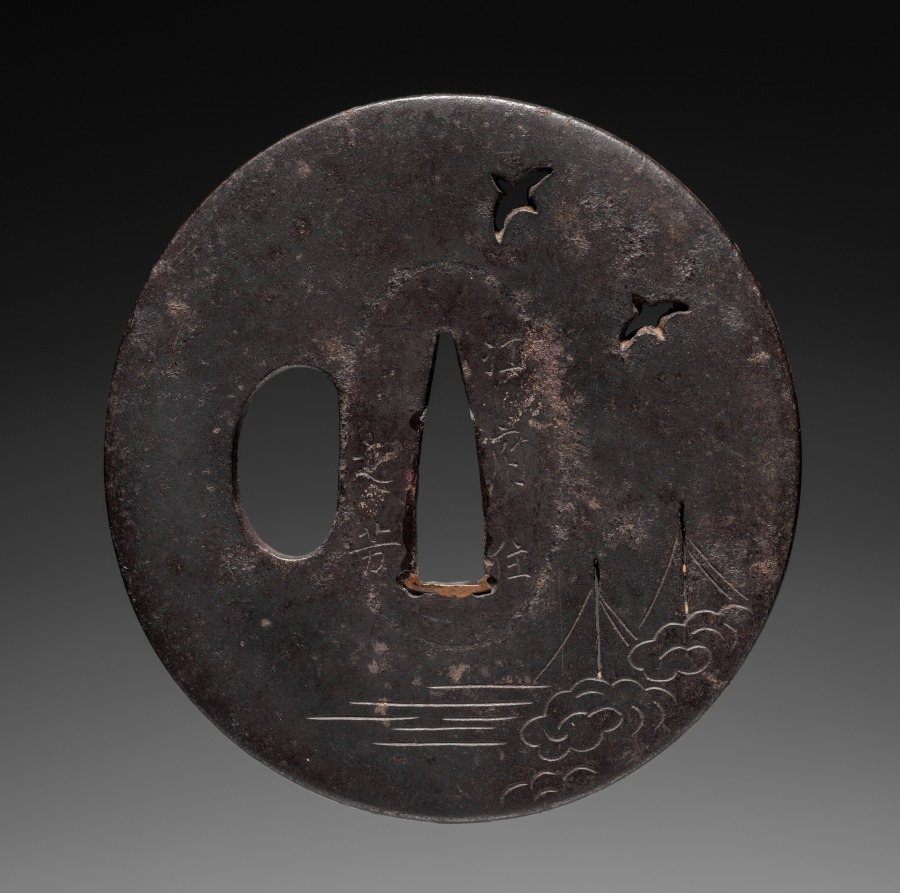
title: Sword Guard (Tsuba) with Birds and Sails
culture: Japan, possibly Edo period (1615-1868)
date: c. 1615–1868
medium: iron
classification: Arms and Armor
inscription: signed: 江府住之芳